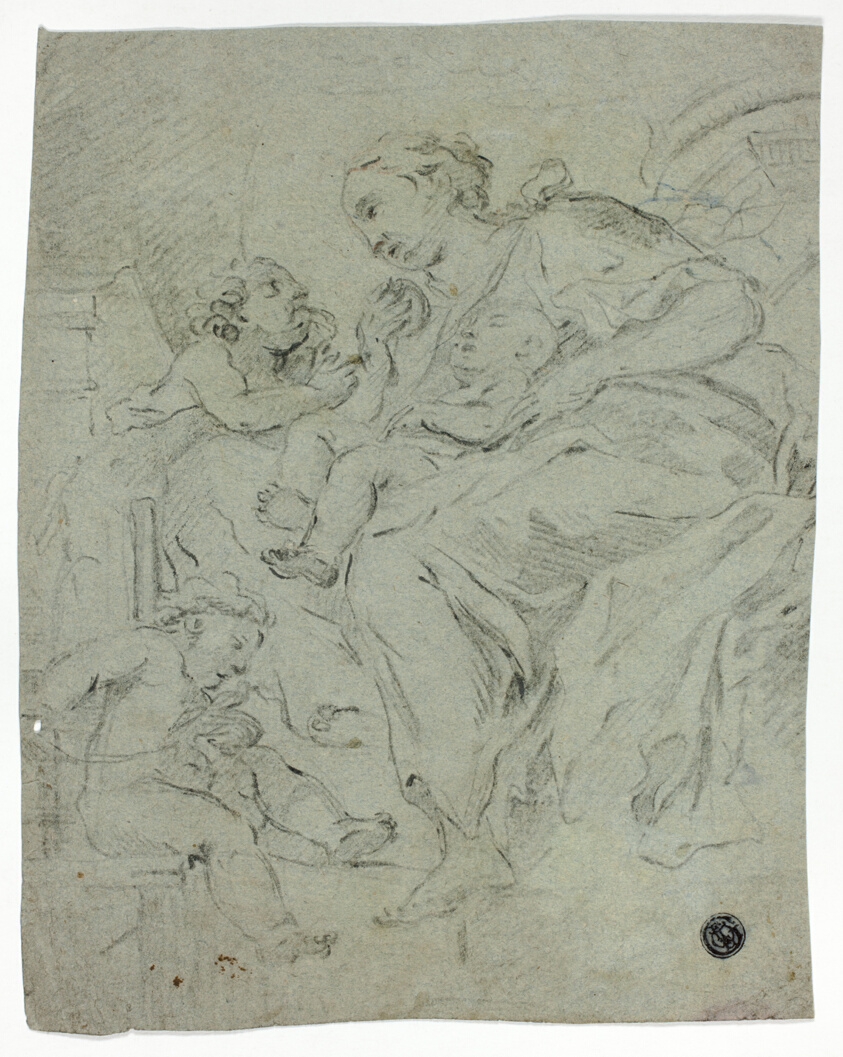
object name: Drawing and Watercolor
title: Madonna and Child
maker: Unknown Artist; Italian, 1700-1799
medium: Black crayon, with traces of red chalk, on blue laid paper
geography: Italy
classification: chalk; drawings (visual works); prints and drawing